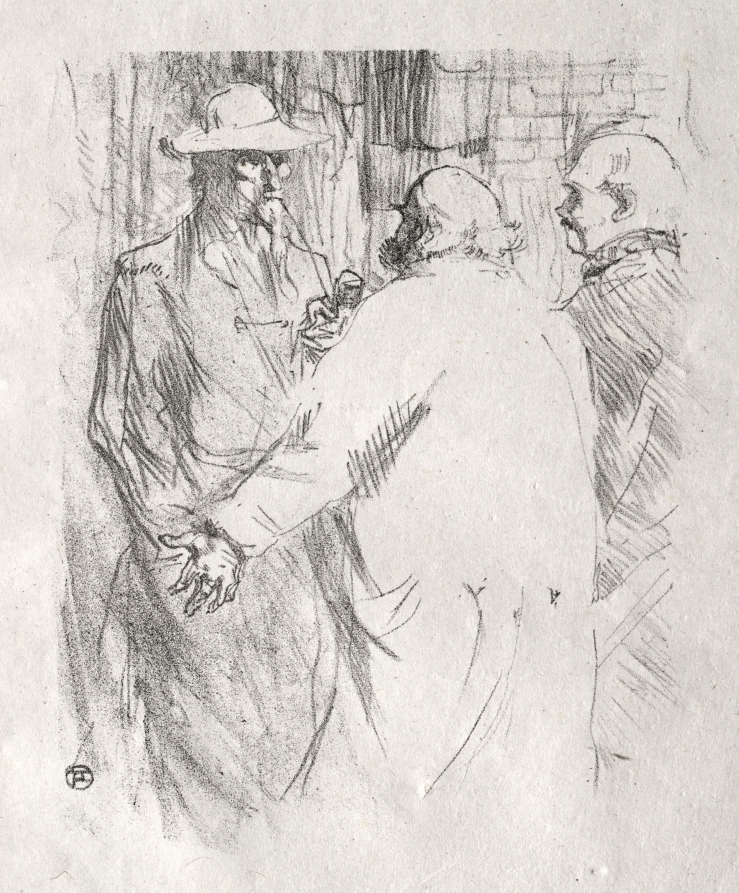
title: Au pied du Sinaï: Clemenceau à Busk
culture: France, 19th century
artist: Henri de Toulouse-Lautrec (French, 1864–1901)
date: 1898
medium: lithograph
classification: Print